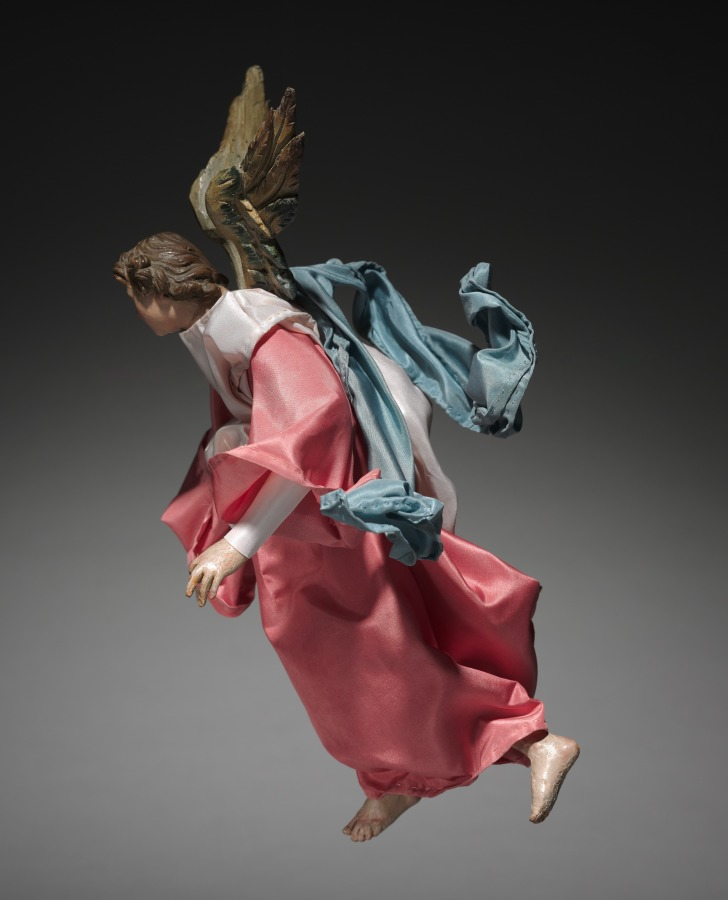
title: Figure from a Crèche: Angel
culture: Italy, Naples, late 18th-early 19th century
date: 1780–1830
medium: painted wood and terracotta with various textiles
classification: Sculpture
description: The practice of creating scenes of the Nativity for the home dates from the early 1700s in Italy, where people began to set up doll-like figures of about a foot or less in height. The custom was particularly popular in Naples around 1800, where crèche scenes (crèche means cradle, or crib) included many figures, whose heads and hands of painted terracotta, stuffed cloth bodies, and clothing adapted from contemporary local costumes gave them an amazingly realistic character. Representations of the birth of Jesus can be traced to the first few centuries of Christianity. Both living creatures and sculptural depictions of them were used from early times. By the late middle ages it was customary to create life-size figures of wood or stone, naturalistically painted, to represent the characters who participated in the events of Jesus's early life. These sculptures were then arranged in scenes illustrating one or both of the most important of these events, the Adoration of the Shepherds and the Adoration of the Magi-the three kings from the East who came to pay homage to the Christ child. Used in churches, these large figures were especially popular in Italy, Central Europe, Spain, and Portugal. This Object in Focus presentation was organized by Henry Hawley, Curator of Renaissance and Later Decorative Arts and Sculpture.